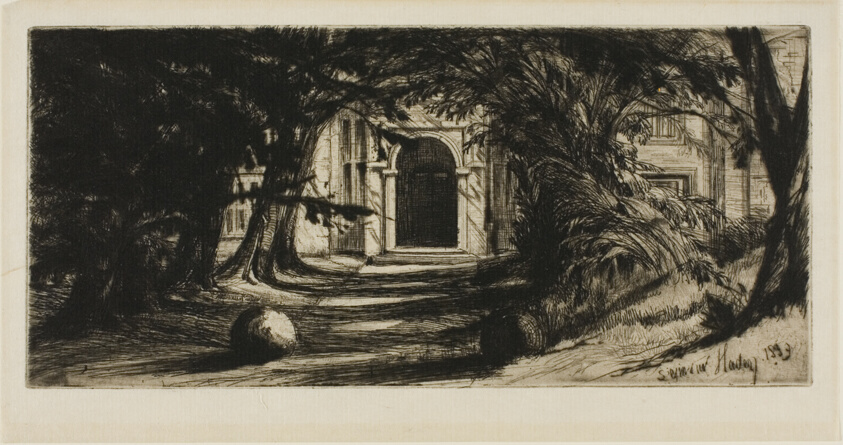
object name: Print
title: Mytton Hall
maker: Francis Seymour Haden (English, 1818-1910)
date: 1859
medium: Drypoint on ivory laid paper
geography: England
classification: drypoint; print; prints and drawing